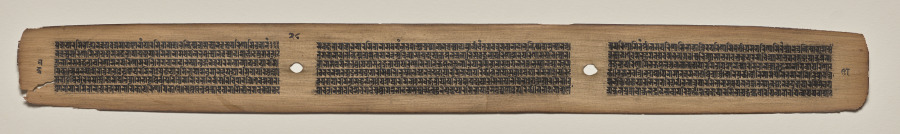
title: Text, Folio 28 (verso), from a Manuscript of the Perfection of Wisdom in Eight Thousand Lines (Ashtasahasrika Prajnaparamita-sutra)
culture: Eastern India, Bihar, Vikramashila Monastery. Painting: Nepal, Kathmandu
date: Sunday, September 14, 1119 (year 239 of the Newar Samvat in the month of Ashvina)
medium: gum tempera and ink on palm leaves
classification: Painting